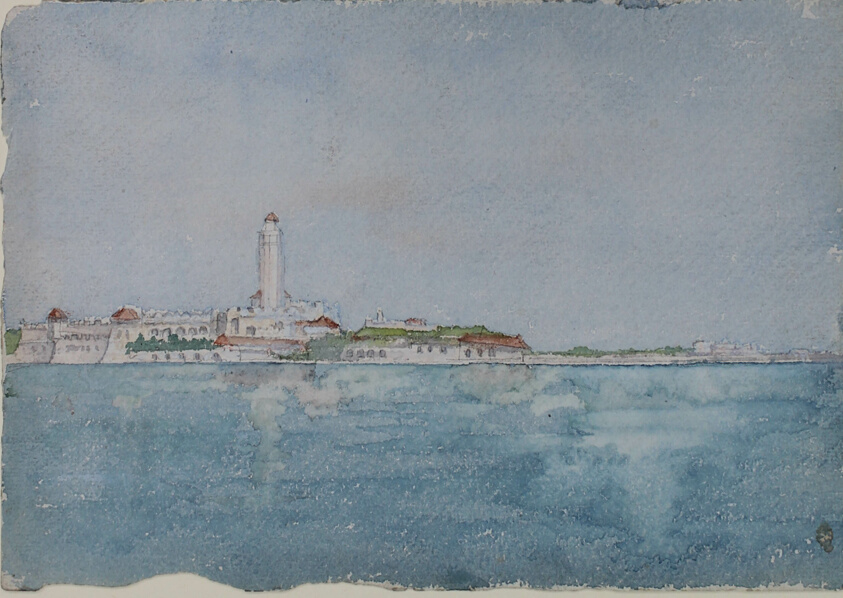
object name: Architectural Drawing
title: Sketch Taken at Algiers, North Africa, Travel Sketch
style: 19th century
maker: Daniel Hudson Burnham (American, 1846–1912)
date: 1896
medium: Watercolor over graphite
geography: Algeria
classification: travel sketch; architectural drawing; architecture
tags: city scenes, architecture, landscapes, North Africa